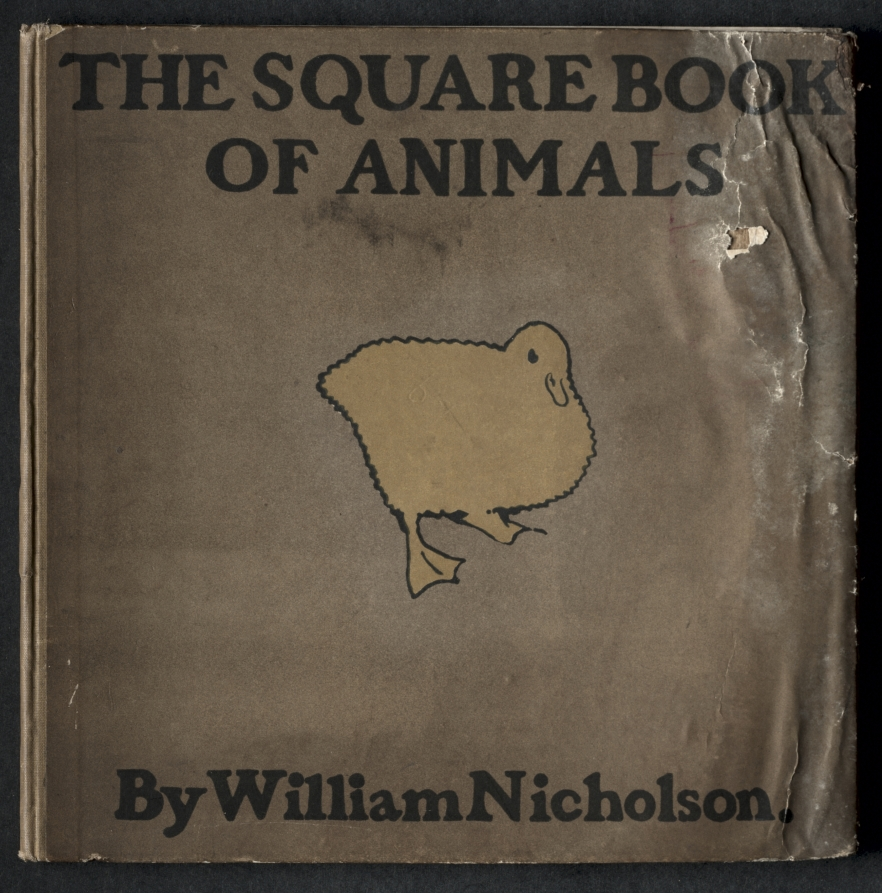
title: "The Square Book of Animals:" Cover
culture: England, 19th century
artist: William Nicholson (British, 1872–1949)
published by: William Heinemann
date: published October 1899 (post-dated 1900+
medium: color lithograph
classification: Print